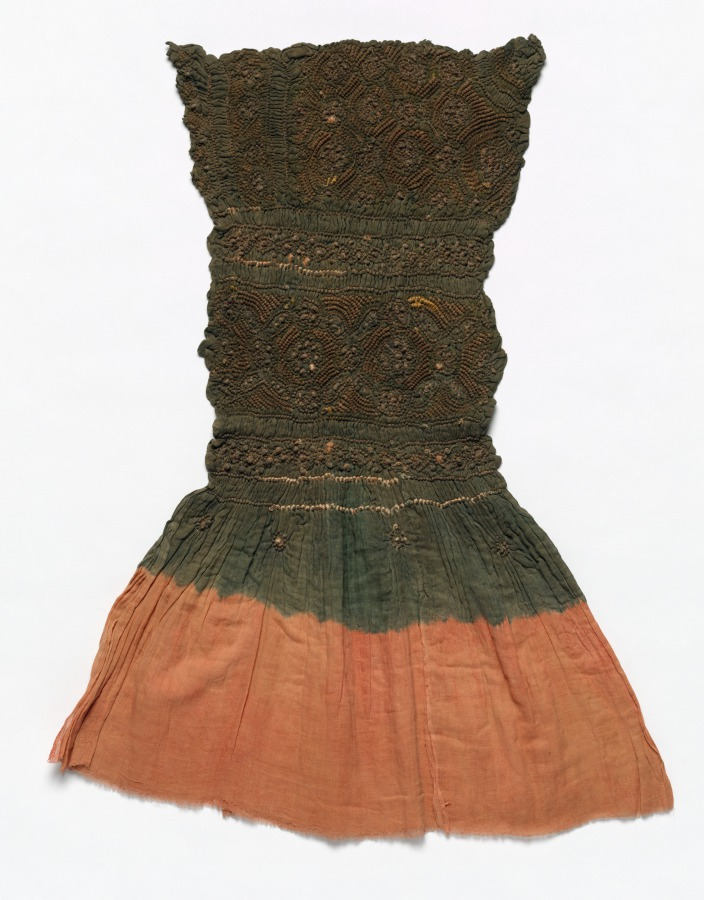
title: Length of Cotton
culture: India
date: early 1900s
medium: cotton; tied and dyed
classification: Textile